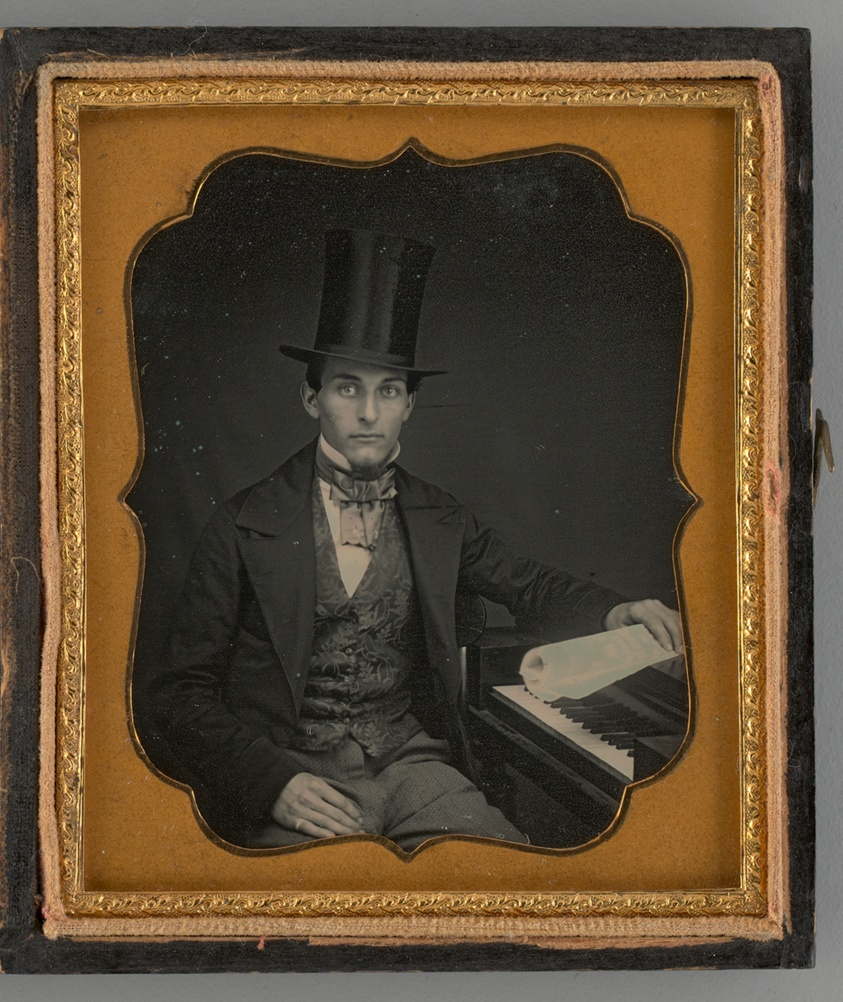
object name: Photograph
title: Untitled (Portrait of a Seated Man with a Top Hat)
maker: Unknown maker; American, 19th century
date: 1855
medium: Daguerreotype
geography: United States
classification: portrait; photography; photographic process; photograph; daguerreotype; portrait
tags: lundberg collection